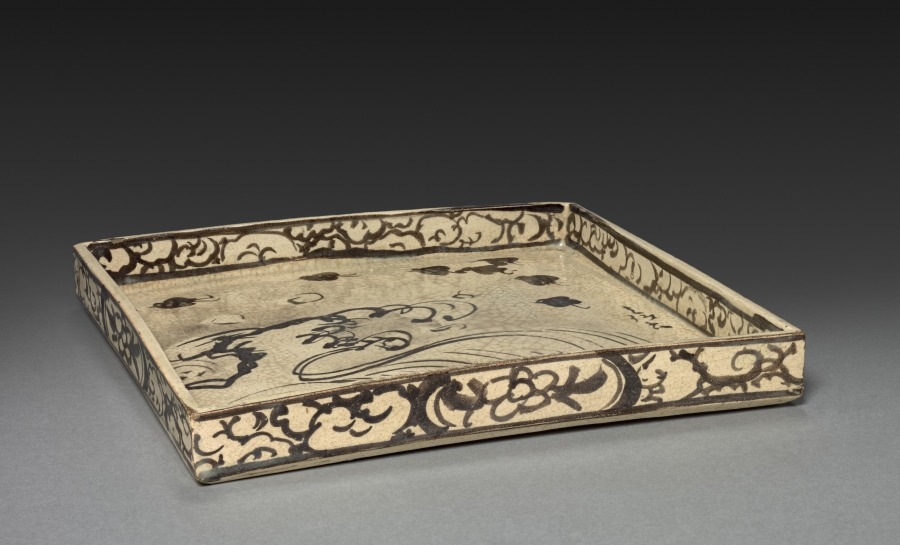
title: Square Dish with Design of Plovers over Waves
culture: Japan, Edo period (1615–1868)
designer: Ogata Kōrin (Japanese, 1658–1716)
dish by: Ogata Kenzan (Japanese, 1663–1743)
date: c. 1700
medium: Glazed stoneware with iron oxide underglaze slip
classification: Ceramic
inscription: design painted by Korin and signed "Jakumei Korin Gaku"; inner and outer faces of four walls probably painted by an assistant at the kiln, underside of dish signed, "Kenzan."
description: The Ogata brothers Kōrin and Kenzan often collaborated on ceramics. This dish is one of a set used for serving tea cakes. Kenzan shaped the dish, after which Kōrin drew the iron oxide design of plovers, a type of shorebird, flying over waves. Kenzan then covered the object with a clear glaze and fired it. Kōrin placed his signature next to his design, while Kenzan signed the back.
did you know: The design of plovers flying over waves derives from Heian period (900s–1100s) literature and later lacquerware designs.